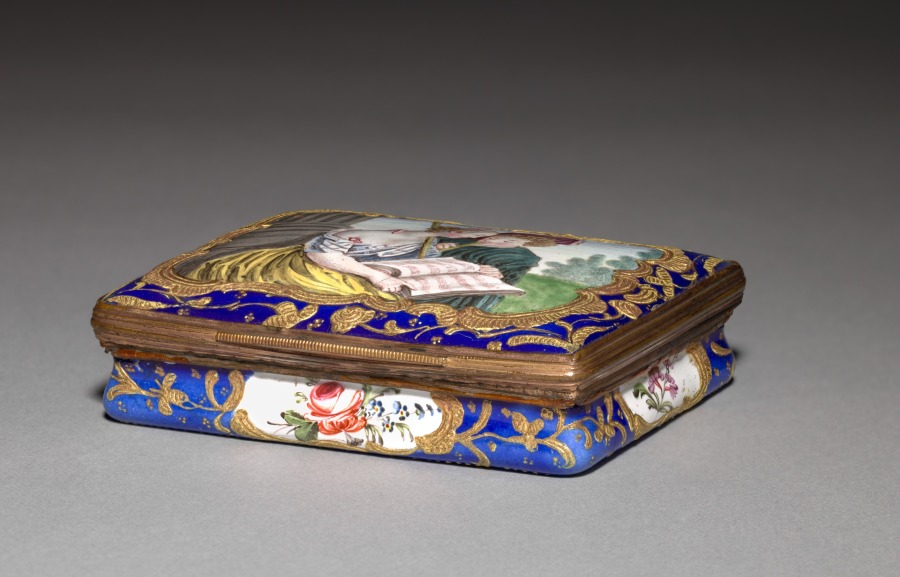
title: Snuff Box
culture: England, South Staffordshire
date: c. 1770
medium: enamel on copper, gilt metal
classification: Miscellaneous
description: Luxurious personal objects, like this snuff box, were an essential part of a privileged wardrobe during the 1700s and early 1800s, emphasizing their owner’s refinement and wealth. Their glittering surfaces, however, disguised a system based on the labor and suffering of enslaved or indentured people, whether in gold or stone mines, tobacco farms, or shops where these goods were made. Like cotton, sugar, and tea, snuff came from British colonies in America, India, and the Caribbean, where enslaved people were exploited to grow these crops under extremely harsh conditions. Slavery was not abolished in much of the British Empire until 1833. Britain and other European nations continued to pursue colonialism with a sense of superiority that found its way into all aspects of life, including decorative objects glorifying their conquests.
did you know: This small, elaborate box held snuff, a form of powdered tobacco that was inhaled in tiny amounts.